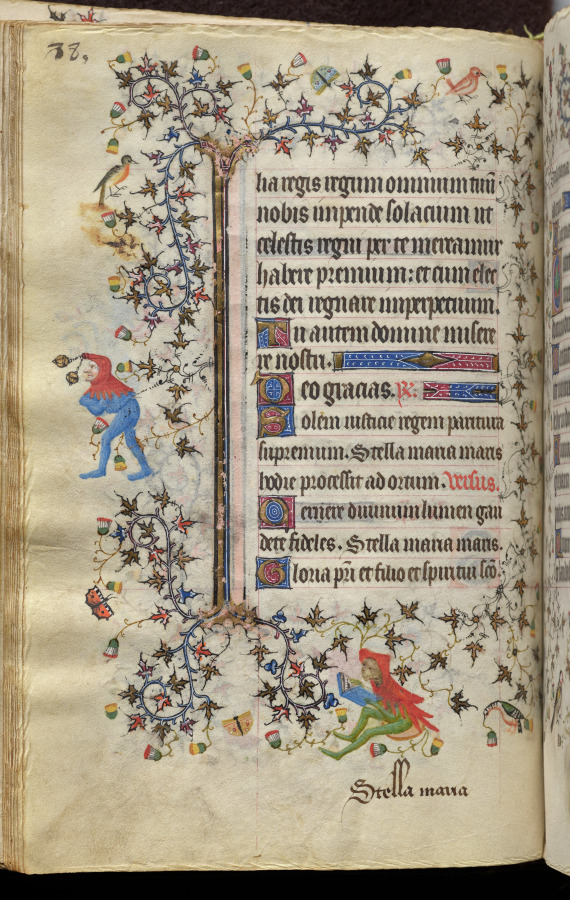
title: Hours of Charles the Noble, King of Navarre (1361-1425): fol. 44v, Text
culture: France, Paris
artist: Master of the Brussels Initials and Associates (French)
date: c. 1405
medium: ink, tempera, and gold on vellum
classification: Bound Volume